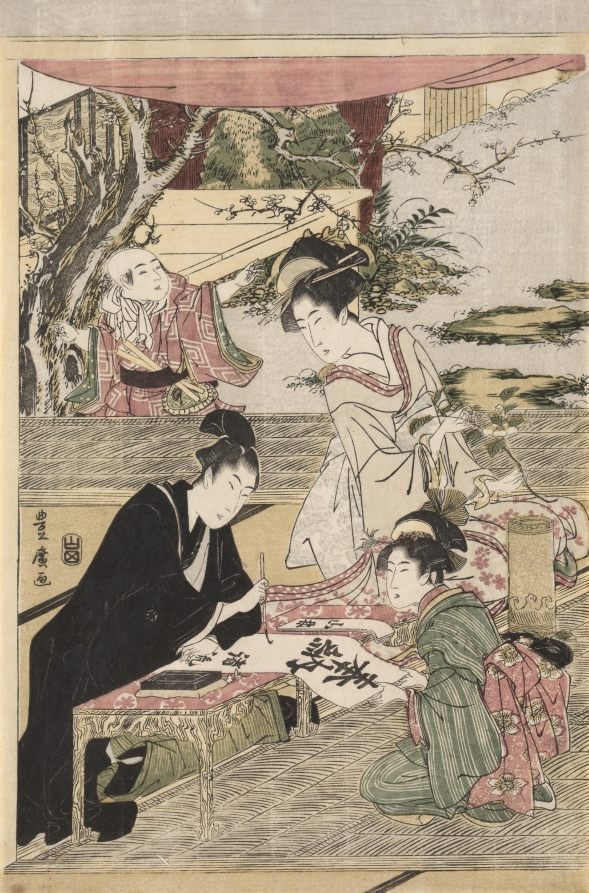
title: Young Man Writing at a Table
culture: Japan, Edo period (1615–1868)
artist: Utagawa Toyohiro (Japanese, 1733–1828)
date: c. 1800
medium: color woodblock print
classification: Print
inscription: Signature: Toyohiro ga Publisher: Yamadaya (Yamada)